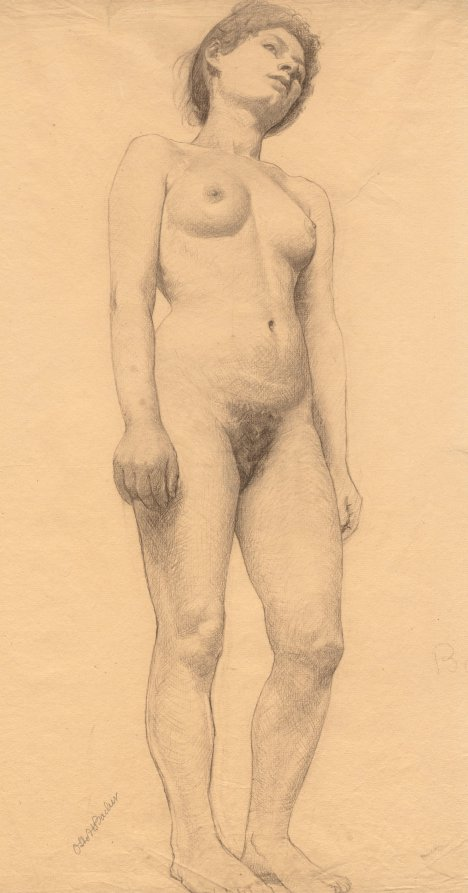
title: Standing Female Nude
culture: America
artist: Otto H. Bacher (American, 1856–1909)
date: probably 1878–79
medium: charcoal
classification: Drawing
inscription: signed, lower left, in black ink: Otto H. Bacher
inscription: lower right, in charcoal: Bacher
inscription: Watermark: P L BAS, ED & Cie (in cartouche)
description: Otto Bacher was the first Cleveland artist to achieve a national reputation. He probably made this drawing while studying at the Royal Academy in Munich.